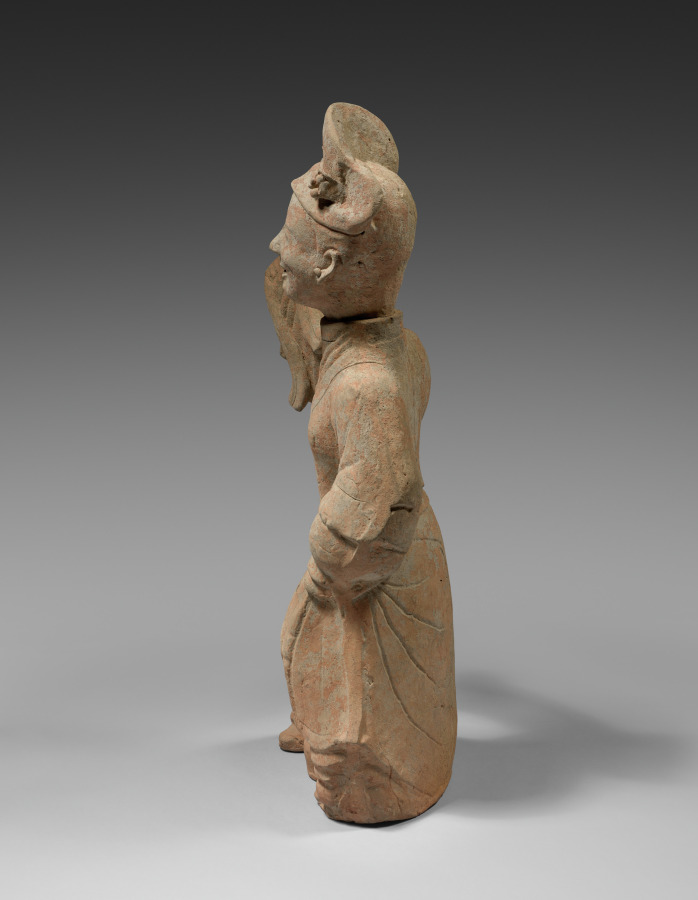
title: Female Figure of a Court Entertainer Dancing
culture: China, Sichuan province, Eastern Han dynasty (25–220 CE)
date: 100s CE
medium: Pottery with traces of color pigment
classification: Ceramic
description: During the Han era, tombs of the elite were provided with sculpted renditions of their earthly entourage, such as guardians or musicians, to signify their status in the afterlife. The female dancer with elaborate hairdo held by flower ornaments raises one arm holding her wide sleeve with one hand, while the other lifts her robe to reveal what appears to be a drum underneath her garment, her face smiling, all in a gesture of an entertainer.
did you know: The dancer lifts her robe to reveal what appears to be a drum underneath her garment.